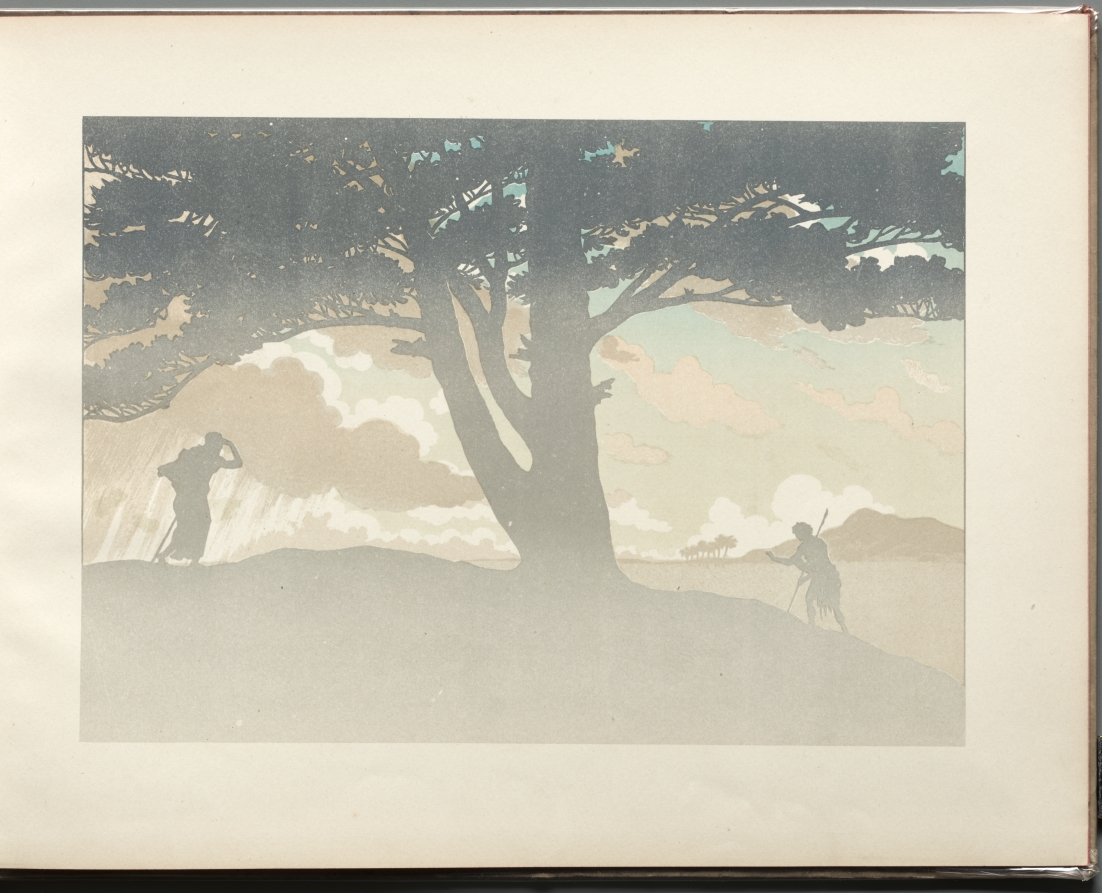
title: The Prodigal Son: Sixième Tableau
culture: France, 19th century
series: Bound Volume illustrating the poetry and music of Georges Fragerolle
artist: Henri Rivière (French, 1864–1951)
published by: E. Flammarion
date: 1895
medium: 15 color lithographs in a bound volume illustrating the poetry and music of Georges Fragerolle: color lithograph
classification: Bound Volume